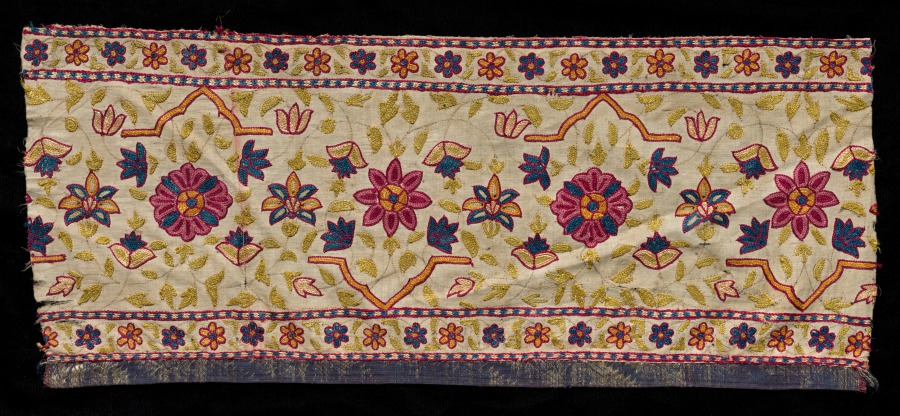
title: Fragment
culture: India, 18th-19th century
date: 1700s - 1800s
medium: embroidery; silk on linen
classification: Textile